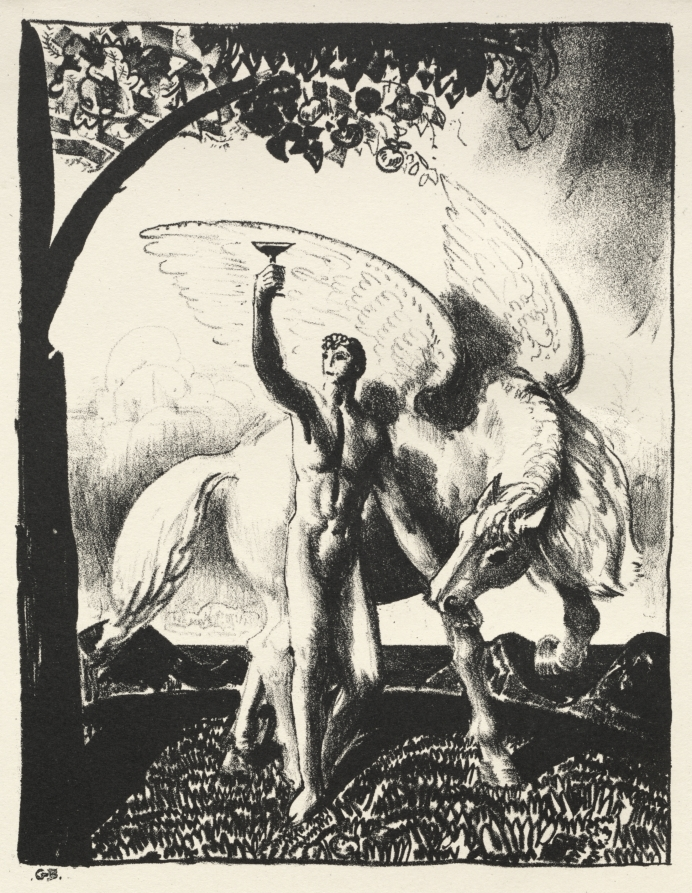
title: New Society Dinner Card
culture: America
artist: George Bellows (American, 1882–1925)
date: 1923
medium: lithograph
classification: Print